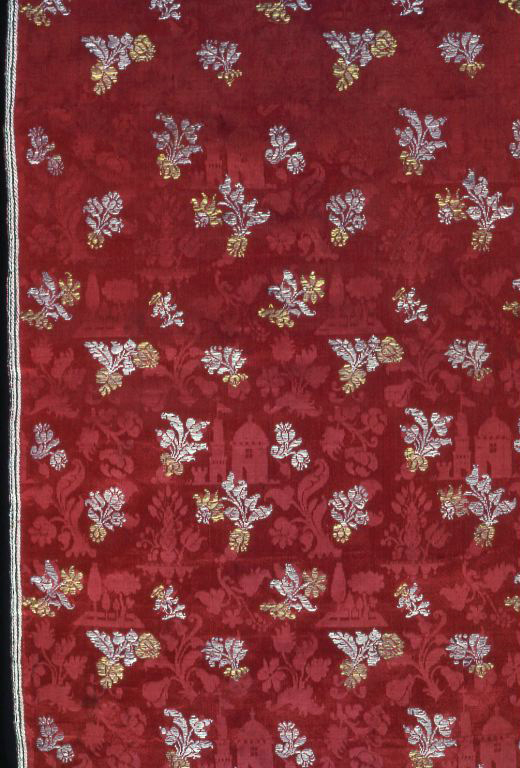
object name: Textile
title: Panel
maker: Italy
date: 17th century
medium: Silk and gilt-strip-wrapped around a silk fiber core, warp-float faced satin weave with supplementary brocading wefts and self-patterned by main warps in floats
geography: Italy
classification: textile; weaving